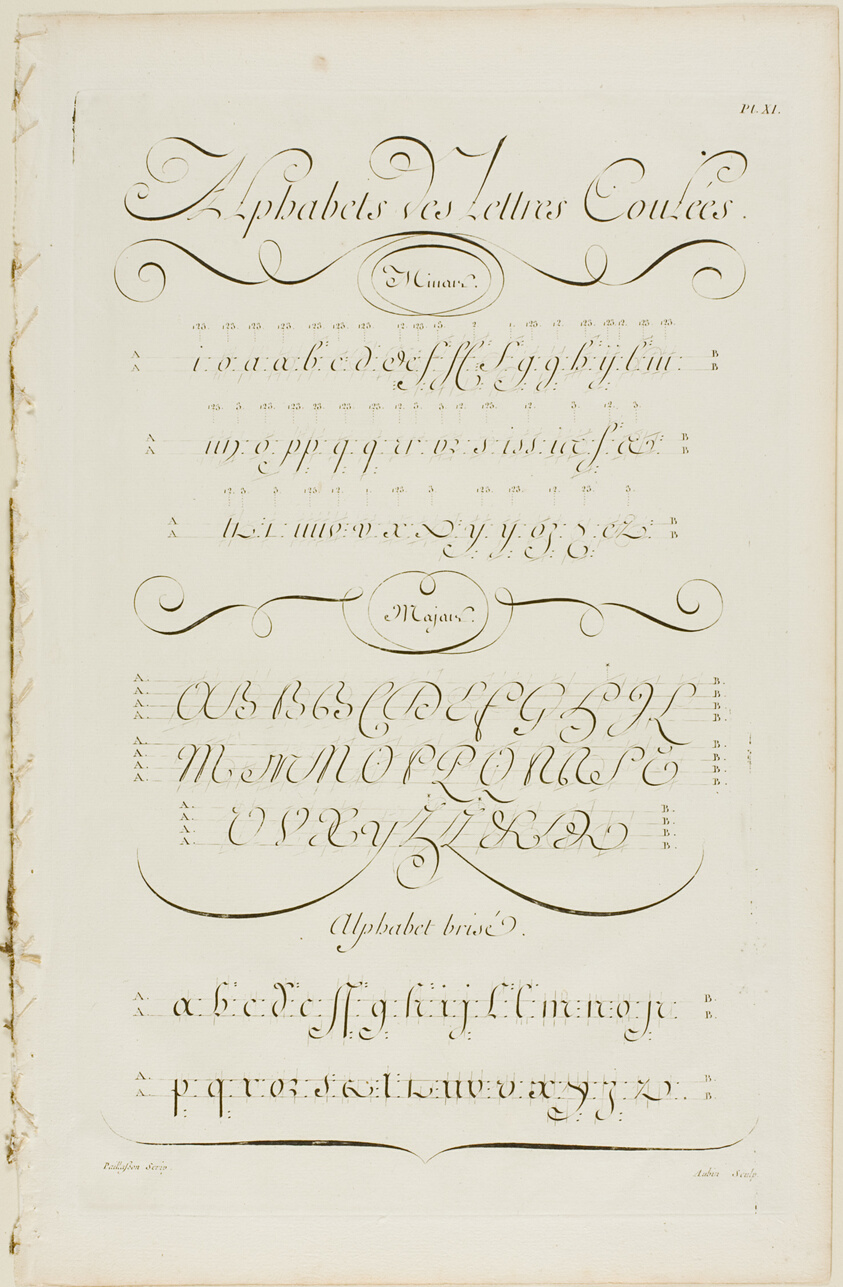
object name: Print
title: Joined Letters of the Alphabet, from Encyclopédie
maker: Aubin (French, active 18th century); after Charles Paillasson (French, 1718-1789); published by André le Breton (French, 1708-1779), Michel-Antoine David (French, c. 1707-1769), Laurent Durand (French, 1712-1763), and Antoine-Claude Briasson (French, 1700-1775)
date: 1760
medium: Engraving on cream laid paper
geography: France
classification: engraving; print; prints and drawing